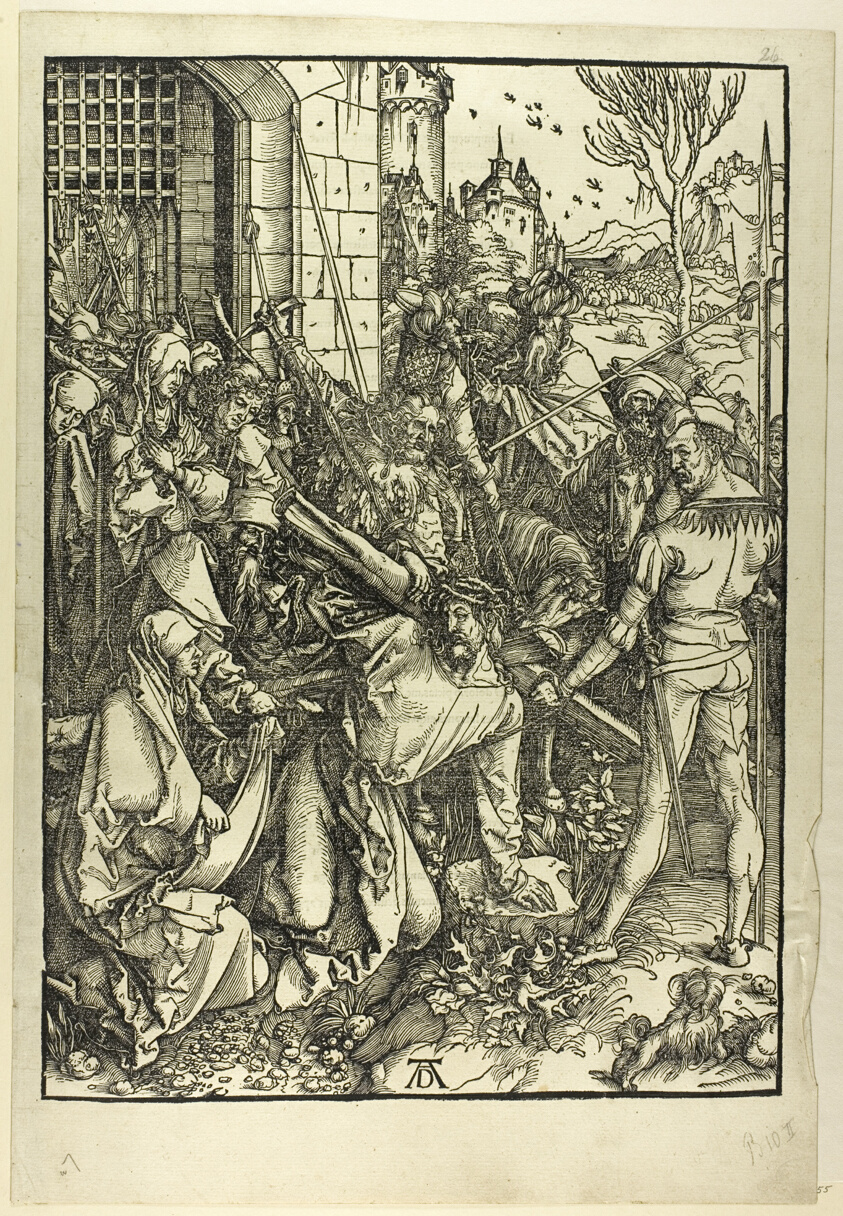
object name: Print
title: The Bearing of the Cross, from The Large Passion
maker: Albrecht Dürer (German, 1471-1528)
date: c. 1498–99, published 1511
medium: Woodcut in black on ivory laid paper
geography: Germany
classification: woodcut; print; prints and drawing; paper